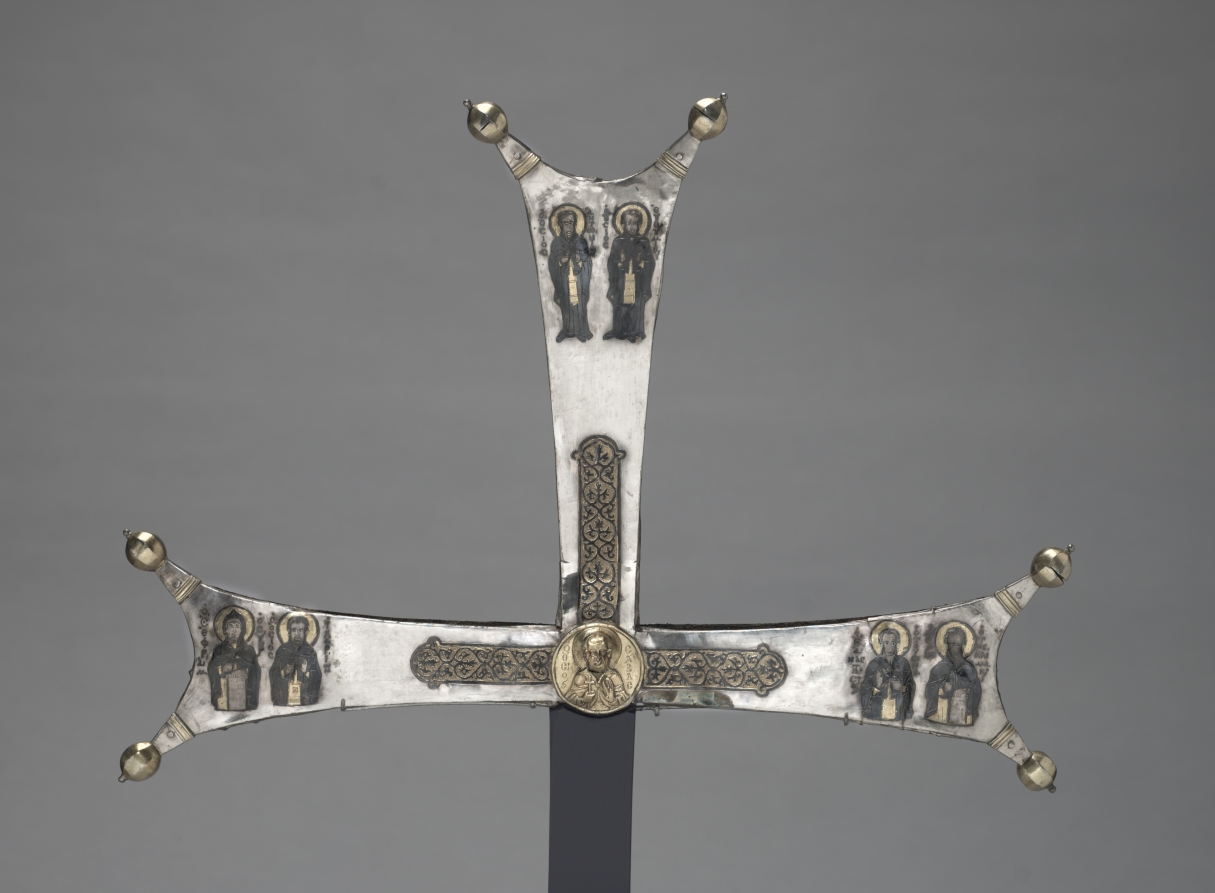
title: Fragment of a Processional Cross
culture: Byzantium, Constantinople, Byzantine period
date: c. 1050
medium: silver gilt, niello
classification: Metalwork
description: Impressively large and elaborately embellished, the cross to which this fragment belonged was likely carried in liturgical processions. The central medallion on its front depicts Christ, flanked by medallions showing the Virgin and Saint John the Baptist. Together they form the Deesis, a powerful Byzantine image formula evoking these saints’ intercession with Christ on behalf of mankind. In the central medallion on the cross’s back is Saint Sabas, founder of an important monastery near Jerusalem, in whose honor the cross was made. He is surrounded by other monastic saints, thus indicating that the cross was likely used by a monastic community.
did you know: Byzantine processions were a feast for the senses. Imagine the scent of sweet and spicy incense wafting through the air, mingling with the sound of sacred chants as priests carry this cross in a procession during the service.